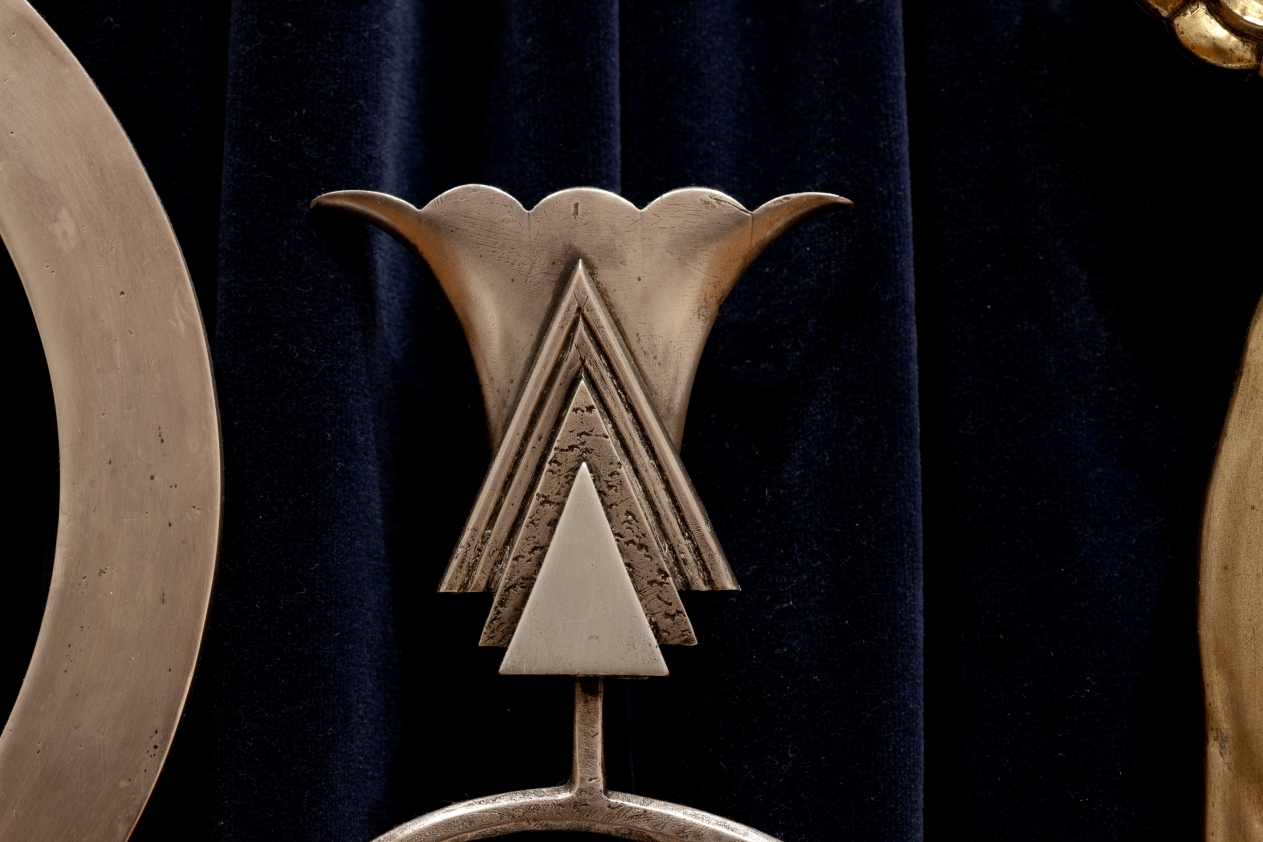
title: Muse with Violin Screen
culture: America, Ohio, Cleveland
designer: Paul Fehér (American, born Hungary, 1898–1990)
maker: Rose Iron Works (America, Ohio, Cleveland, est. 1904)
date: 1930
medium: Steel, brass; silver and gold plating, cotton velveteen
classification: Metalwork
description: Since the early years of the 20th century, the Rose Iron Works, a Cleveland supplier of architectural ornament, has produced distinguished metalwork. The company’s founder, Martin Rose, was born in Austria-Hungary and studied ornamental metalsmithing in Vienna prior to immigrating to Cleveland in 1902. In the 1920s, he hired a talented young Parisian designer, Paul Fehér, to work for the firm. Fehér’s designs, culminating in this massive screen, brought a modern European sensibility to the Rose Iron Works production. With its geometric patterning, highly stylized and abstracted natural forms, and the central figure reminiscent of the celebrated jazz singer Josephine Baker, this screen reflects the classic motifs of Art Deco design.